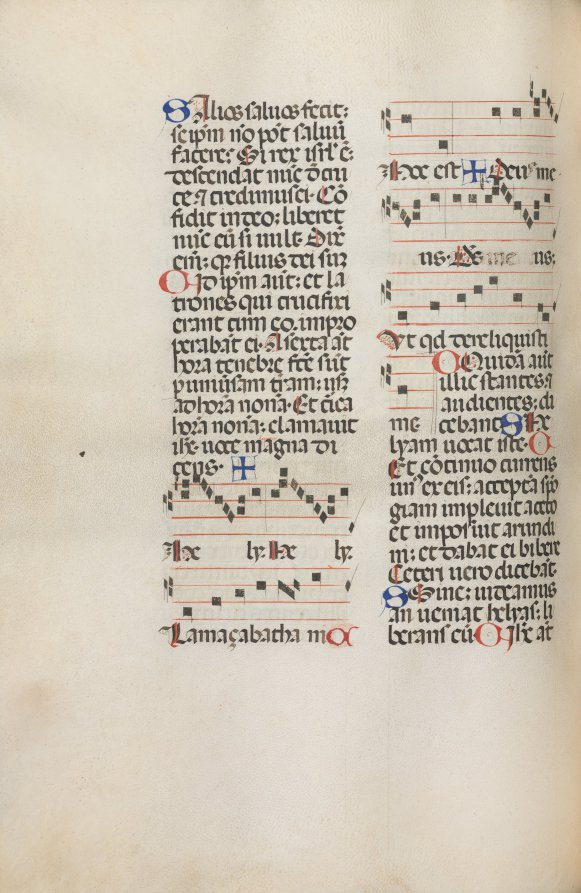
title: Missale: Fol. 121v: contains music for "Hely Hely Lama etc." within St. Mattion Passion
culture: Italy, Perugia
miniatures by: Bartolommeo Caporali (Italian, c. 1420–1503)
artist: assisted by Giapeco Caporali (Italian, d. 1478)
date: 1469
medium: ink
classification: Bound Volume